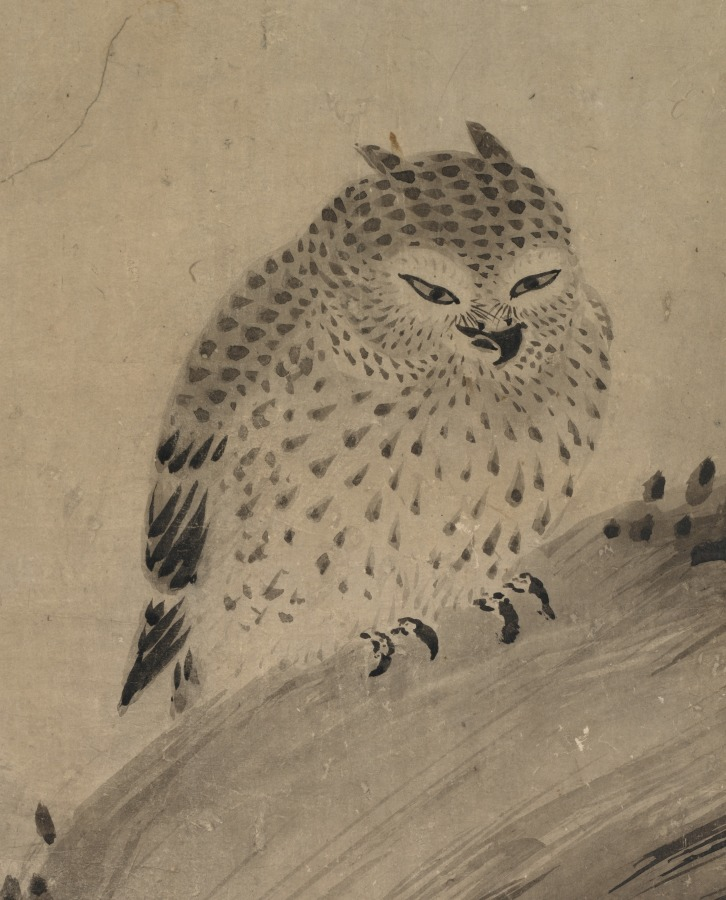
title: Wild Geese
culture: Japan, Edo period (1615–1868)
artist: Kano Sanraku (Japanese, 1559–1635)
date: late 1500s-early 1600s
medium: pair of six-fold screens; ink on paper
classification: Painting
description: Depictions of geese usually appear as ink paintings in Japan during the 1200s. They later show up in the colorful landscapes of illustrated handscrolls. Such early ink renditions of the birds have long been associated with classical Chinese Zen painting and poetry, which was avidly admired and collected in medieval Japan. In the screens on display, the artist portrayed the waterfowl in a pastoral setting without reference to classical or religious themes. Such ordinary subjects were imbued with special meaning in 14th- and 15th-century Japan through associations with continental culture, Zen thought and poetry, and famous Chinese monk-painters whose painting techniques had become revered as visual emblems of Zen principles. The screens here reflect the continuation of that painting tradition in the late 1500s or early 1600s by the head of the most important studio in Kyoto. Sanraku also executed a number of colorful folding screen compositions, but here pays homage to the style of early Zen painting.